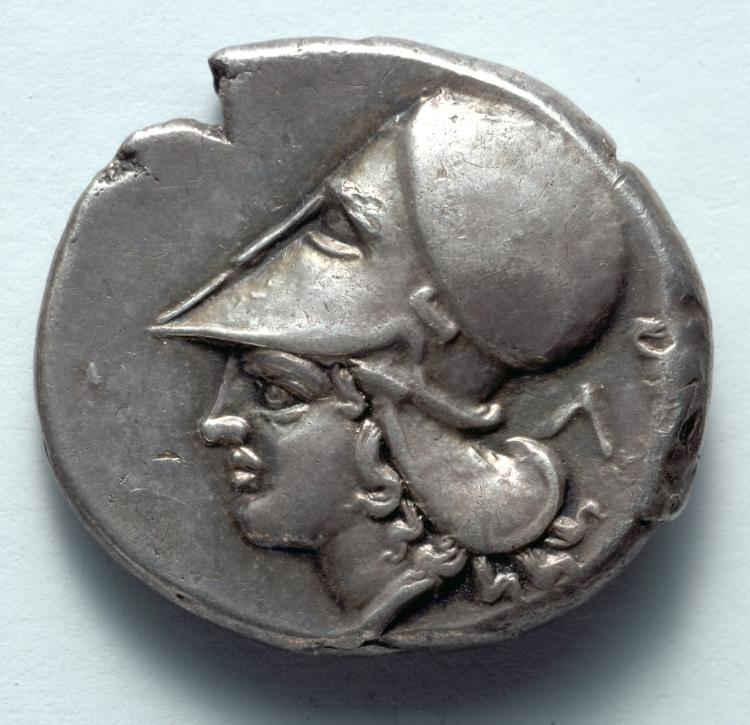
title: Stater: Head of Athena (reverse)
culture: Greek, minted at Leukas (Akarnania)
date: c. 350–300 BCE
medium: silver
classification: Coins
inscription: Λ